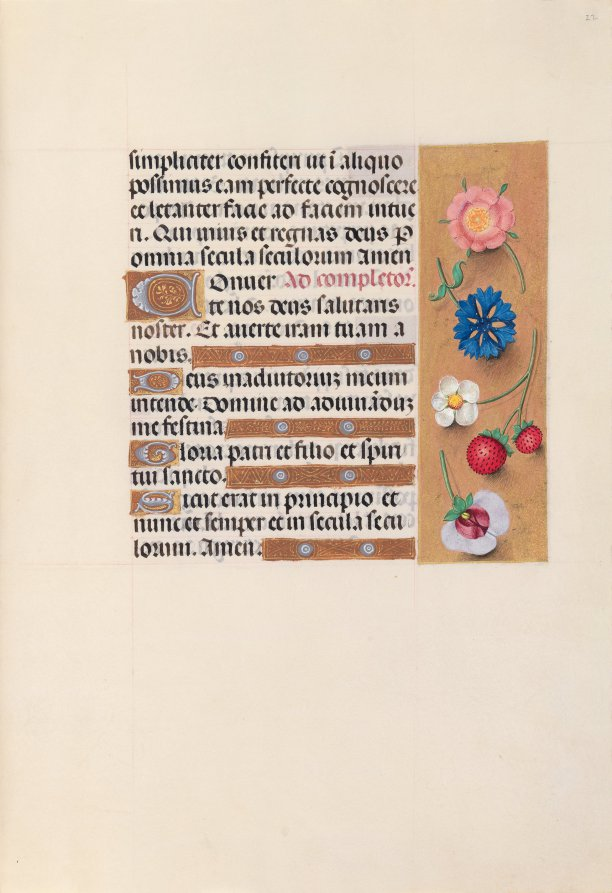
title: Hours of Queen Isabella the Catholic, Queen of Spain: Fol. 22r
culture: Flanders, Ghent and Bruges, late 15th century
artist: Master of the First Prayerbook of Maximillian (Flemish, c. 1444–1519)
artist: and Associates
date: c. 1500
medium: ink, tempera, and gold on vellum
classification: Bound Volume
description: This manuscript was illuminated by a circle of at least five highly organized manuscript painters active in the Flemish cities of Ghent and Bruges. The principal illuminator was Alexander Bening, who painted the majority of the book's miniatures. Manuscripts produced by this circle of artists are renowned for the decoration of their borders, which typically feature a rich variety of realistically-painted flowers, birds, and butterflies. This prayer book, called a book of hours, was intended not for a cleric, but for the private devotions of a lay person-in this case, Isabella the Catholic, Queen of Spain (1451-1504). Isabella's coat of arms embellishes the book's frontispiece. It is unlikely that the book was commissioned by the Queen herself; rather, she probably received it as a diplomatic gift from someone courting her patronage, perhaps Cardinal Francisco Jimenez de Cisneros. A Franciscan friar, Jimenez was dependent upon Isabella for his advancement, first to the post of Queen's confessor in 1492, and then to Archbishop of Toledo in 1495.